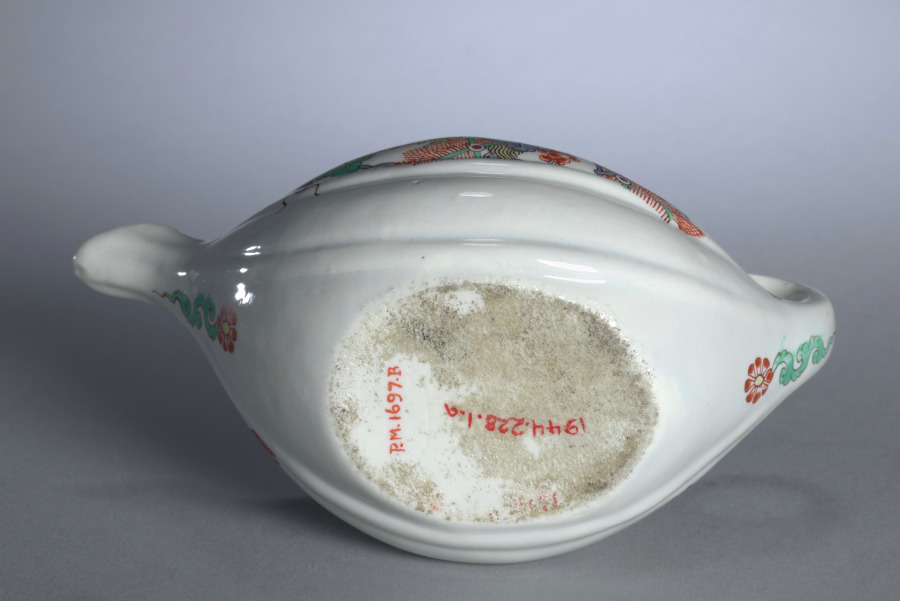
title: Teapot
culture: France, Chantilly, 18th century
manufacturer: Chantilly Porcelain Factory (French)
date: c. 1730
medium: soft-paste porcelain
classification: Ceramic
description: The pieces composing this individual tea set are entirely typical of Chantilly soft-paste porcelain in the Kakiemon style. Both the form and decoration of these pieces were inspired by Japanese prototypes. The use of knobs in the form of trumpet-shaped blossoms is characteristic of Chantilly wares.